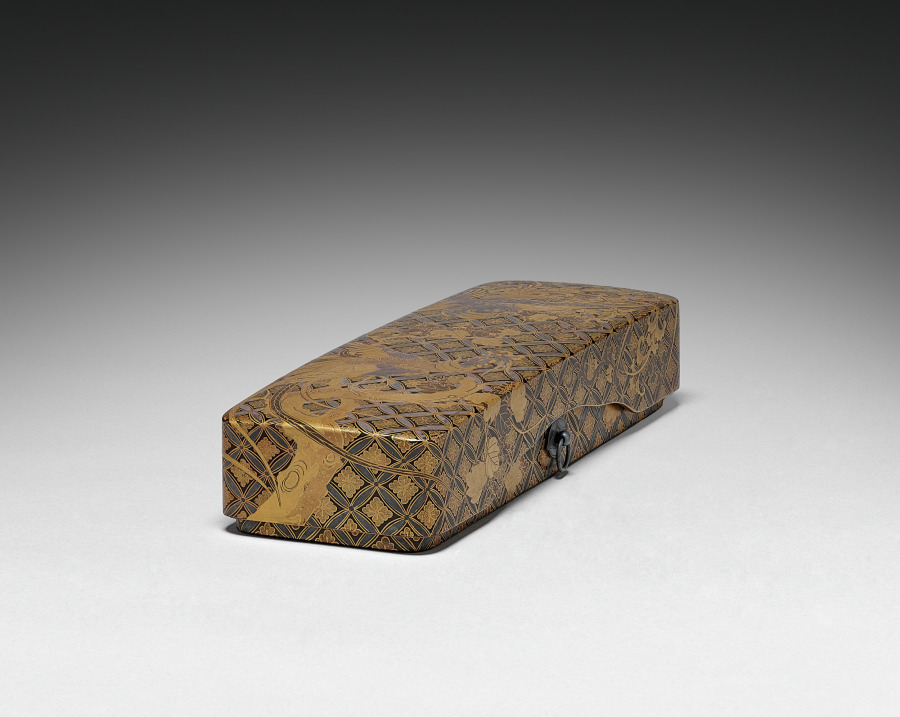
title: Letter Box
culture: Japan, Edo period (1615–1868)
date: 1615–1868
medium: lacquer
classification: Lacquer